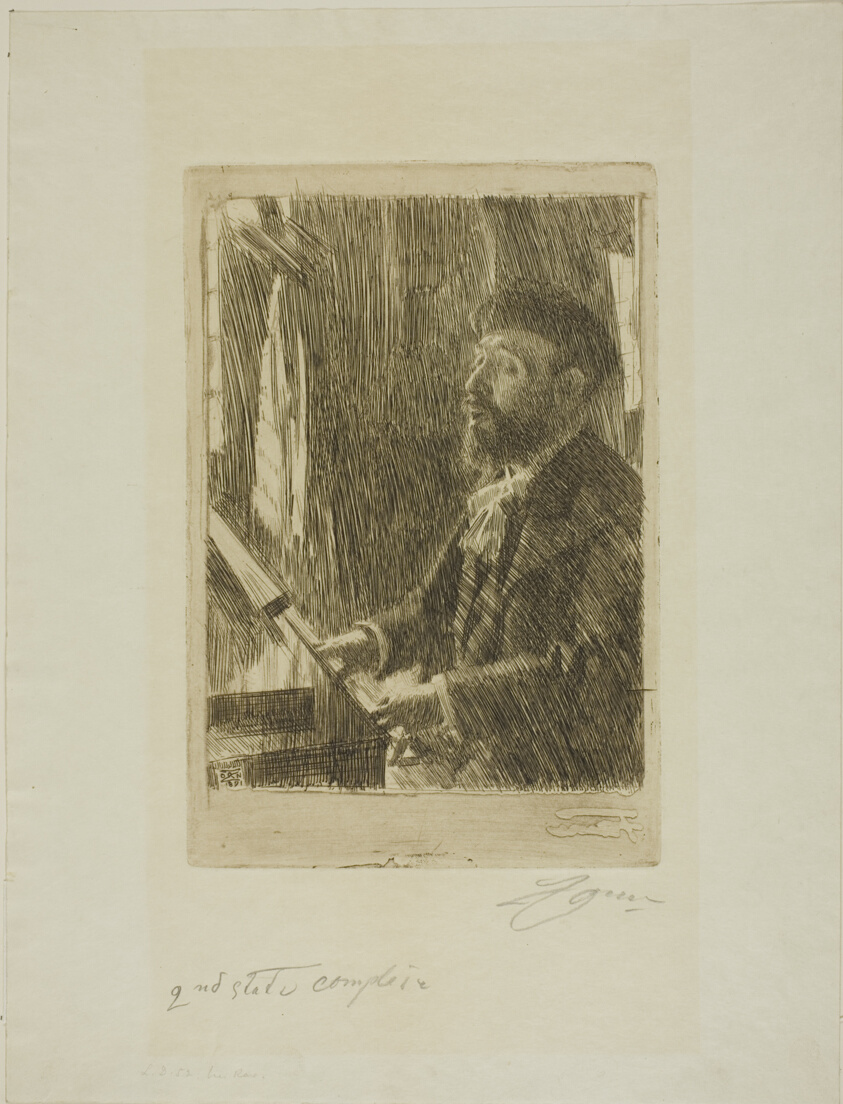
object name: Print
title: J.B. Faure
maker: Anders Zorn (Swedish, 1860-1920)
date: 1891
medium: Etching on off-white wove paper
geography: Sweden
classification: etching; print; prints and drawing